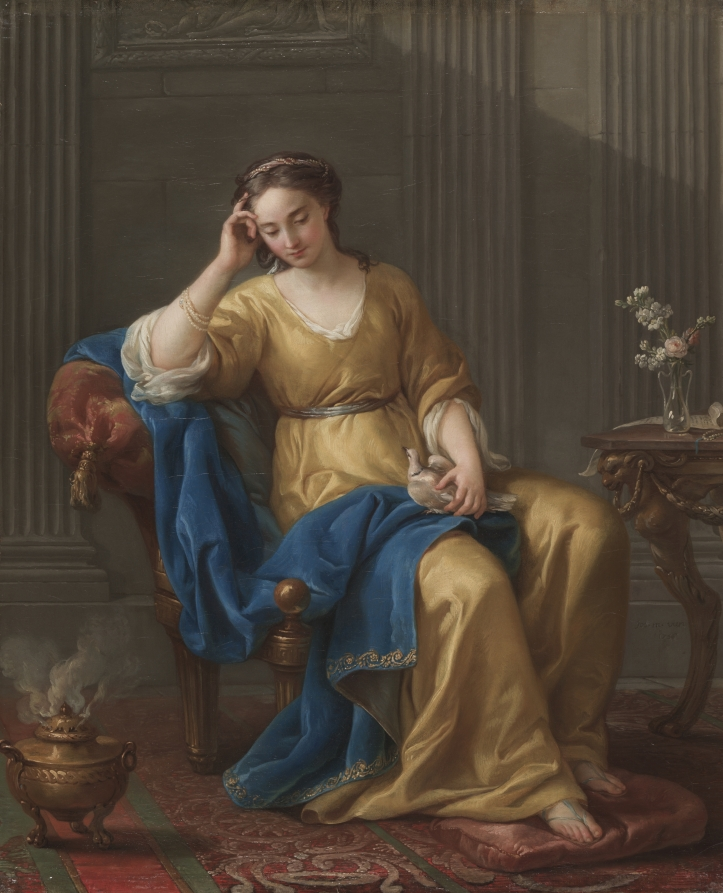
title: Sweet Melancholy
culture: France, 18th century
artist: Joseph-Marie Vien (French, 1716–1809)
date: 1756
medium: oil on canvas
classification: Painting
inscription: Signed lower right: "jos. m. vien / 1756"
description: The chair, brazier, table, and the setting all show Vien's interest in bringing archaeological accuracy to a new level of precision. Yet his delicate handling and graceful palette derive squarely from 18th-century French painting. The gesture of the melancholic figure, with her head on her hand, has roots going back to the Renaissance. Nonetheless, the painting has a wistful rather than tragic tone. Indeed, images of women in interiors, contemplating a letter with longing or sadness, derive from earlier Dutch paintings of daily life, here transformed into an ancient context.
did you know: Look closely—three strands of pearls appear in this painting.